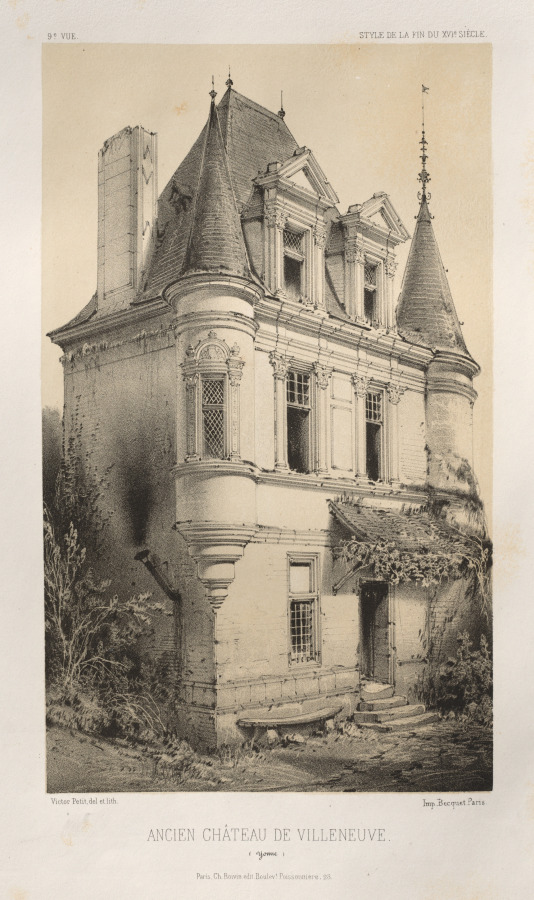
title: Architecture Pittoresque ou Monuments des xveme. Et xvieme. Siecles: Chateaux De France des XV et XVI Siecles: Pl. 9, Ancien Chateau de Villeneuve (Yonne)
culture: France, 19th century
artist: Victor Petit (French, 1817–1874)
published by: Charles Boivin (publisher and editor); Lith de Godard a Paris (printer)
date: 1860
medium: lithograph with tint stone, from portfolio of 100 lithographs with tint stone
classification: Print